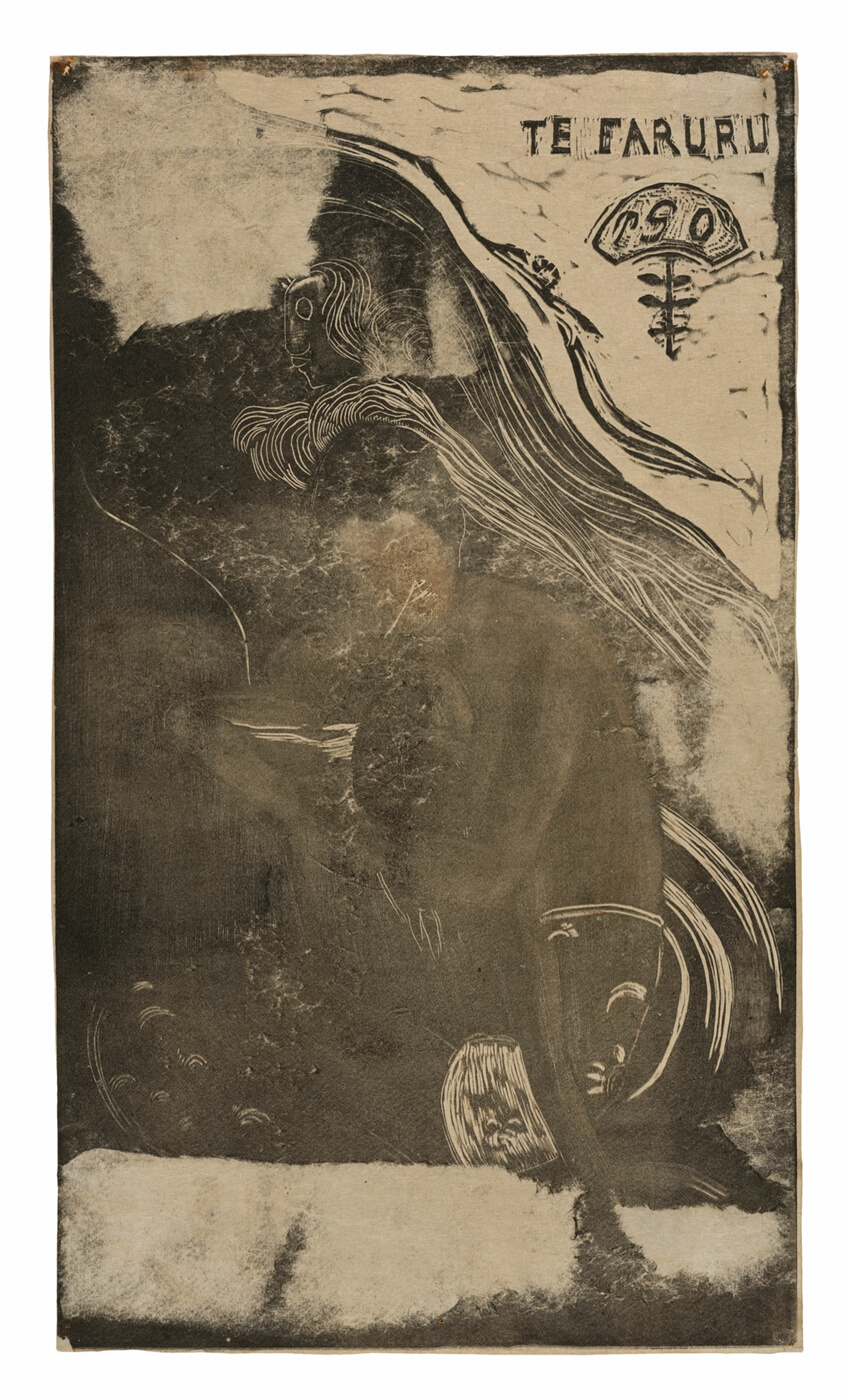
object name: Print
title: Te faruru (Here We Make Love), from the Noa Noa Suite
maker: Paul Gauguin (French, 1848-1903)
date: 1893–94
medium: Wood-block print, printed twice in brown and black inks, with selective wiping, and a transferred twill impression, on cream wove Japanese paper, laid down on cream laid Japanese paper (a laminate made by the artist)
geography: France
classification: woodcut; print; prints and drawing